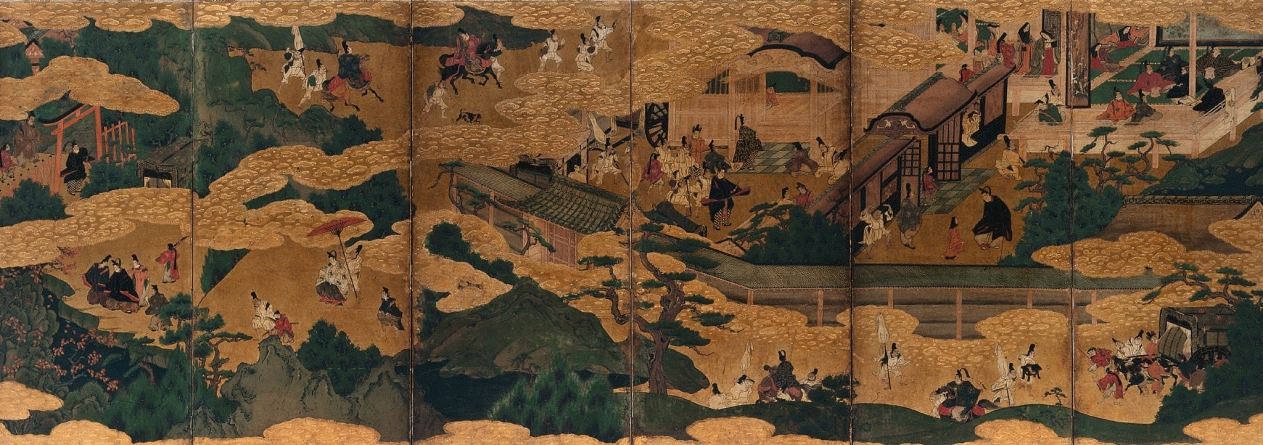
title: Scenes from the Tales of Ise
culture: Japan, Edo period (1615–1868)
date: mid-1600s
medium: One of a pair of six-panel folding screens; ink, color and gold on paper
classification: Painting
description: While the 11th-century Tale of Genji is universally regarded as Japan's literary masterpiece, the source for visual imagery in Japanese culture is rivaled by another literary classic, the Tales of Ise. A 10th-century anthology of poems interspersed with commentary, the Ise portrays the emotional and geographical journey of a courtier from the capital (Kyoto) into the countryside and beyond. The poems describe features of the natural, untamed terrain, linking them to the rather melancholy state of the traveler. Since the Tales of Ise was—and remains today—well read by educated Japanese, a person viewing these folding screens would immediately recognize its subject, organized as a series of discrete scenes read from right to left. Neither a signature nor a seal identifies the artist, but judging from related paintings, the work can be ascribed to an artist working in Kyoto during the first quarter of the 17th century in the manner of the painter Iwasa Matabei (1578–1650). This type of historical narrative composition became quite popular around 1600 among patrons favoring a distinctly Japanese style of painting which employed rich mineral pigments and a liberal use of gold.